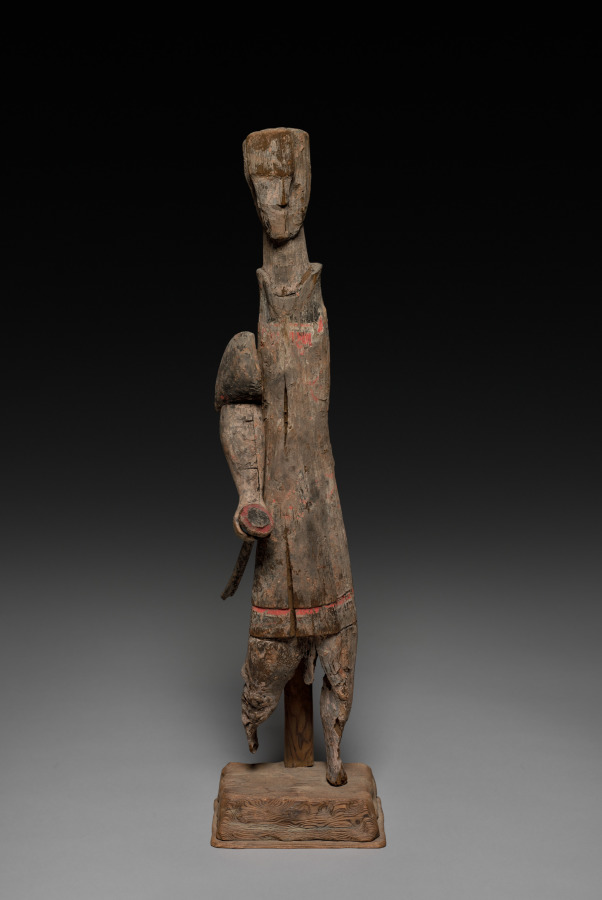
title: Figure with Sword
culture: China, Eastern Zhou dynasty (770–256 BCE), Warring States period (475–221 BCE)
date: 400–300 BCE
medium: wood with traces of polychromy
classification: Sculpture